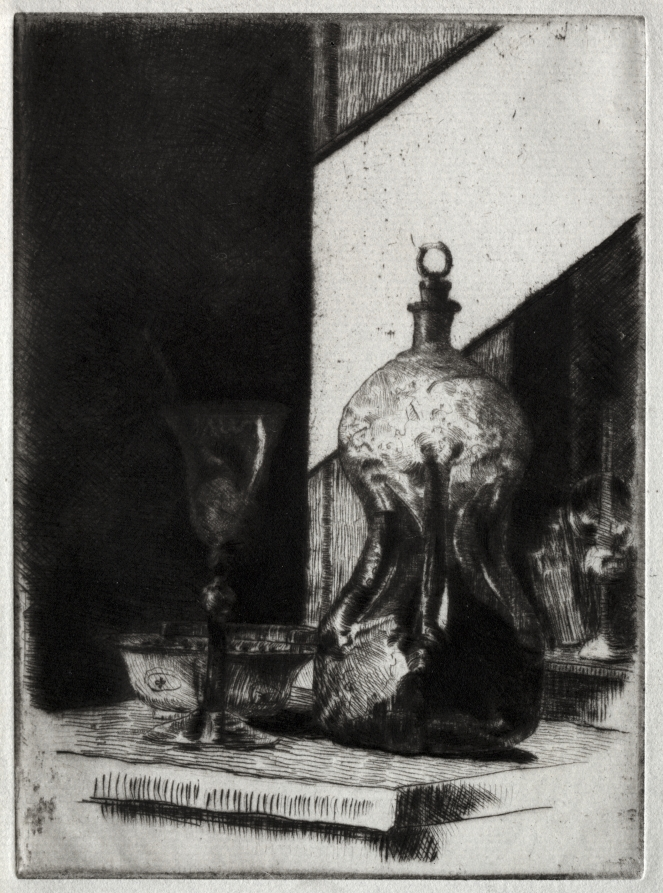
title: Dutch Schnapps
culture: America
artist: Julian Alden Weir (American, 1852–1919)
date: 1885–1893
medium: drypoint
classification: Print